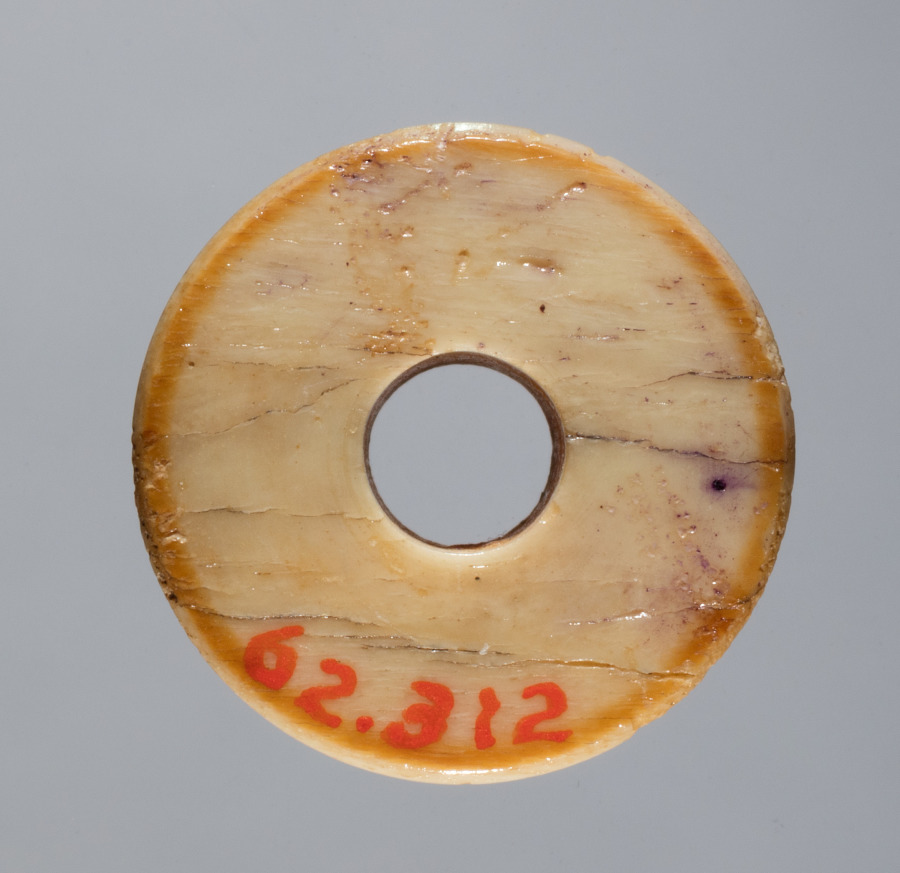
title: Spindle Whorl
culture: Iran, early Islamic period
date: 700s - 900s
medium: bone, incised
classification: Spindle Whorl